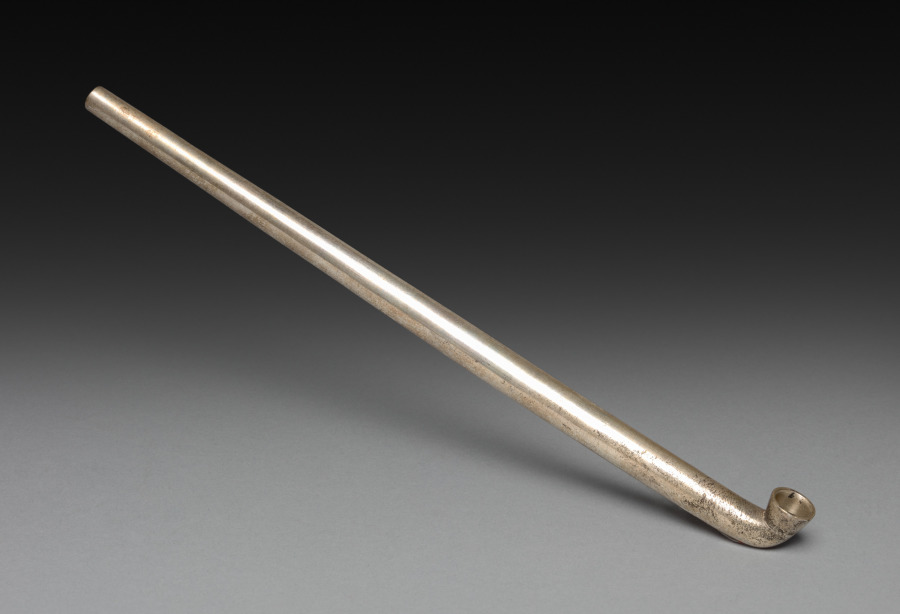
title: Tobacco Pipe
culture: Japan, Edo period (1615–1868) to Meiji period (1868–1912)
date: 1800s–early 1900s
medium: silver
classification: Miscellaneous